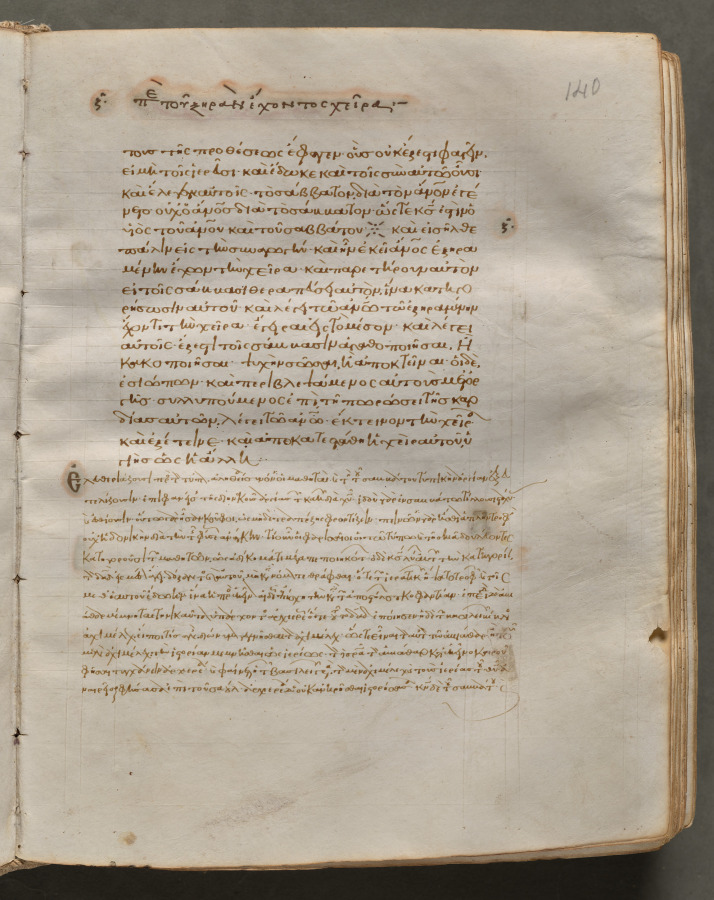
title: Text, folio 140 (recto), from a Gospel Book with Commentaries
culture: Byzantium, Constantinople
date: c. 1000–1100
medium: ink, tempera, and gold on vellum; leather binding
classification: Bound Volume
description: Each of the four gospels in this book opens on a page with brilliantly illuminated borders depicting the author of the text as well as birds-principally peacocks, symbols of the immortality of the soul-and fountains, representing the fountain of life and the salvation of the soul. This volume consists of 428 leaves with texts in Greek. Its level of sophistication suggests that it was probably written and decorated in a monastery in Constantinople.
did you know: Gospel Books were carried in procession through Byzantine churches.